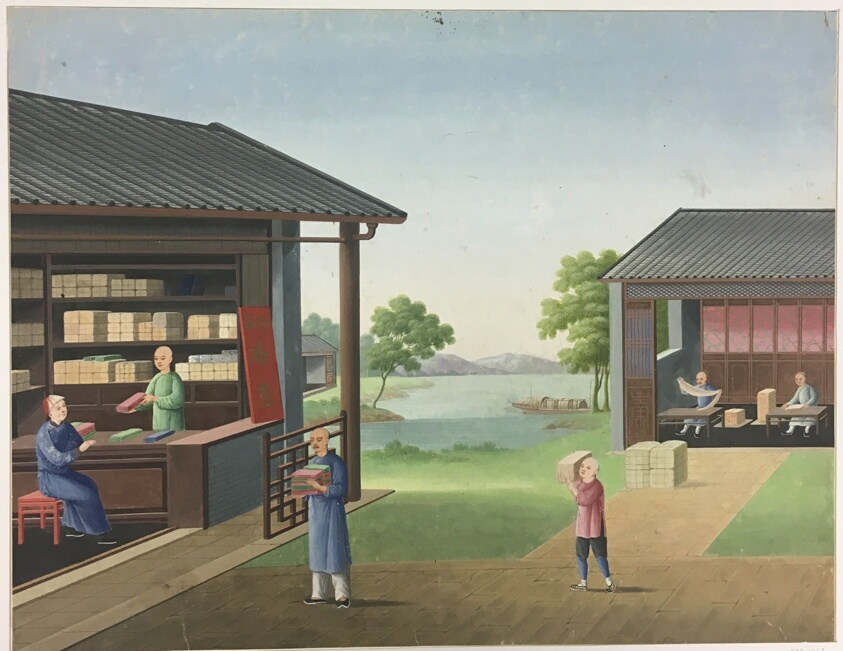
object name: Painting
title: Spinning Cloth, Preparing Tea Leaves, Preparing Silk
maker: China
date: Early 19th century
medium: Colors on paper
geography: China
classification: painting; asian art; print